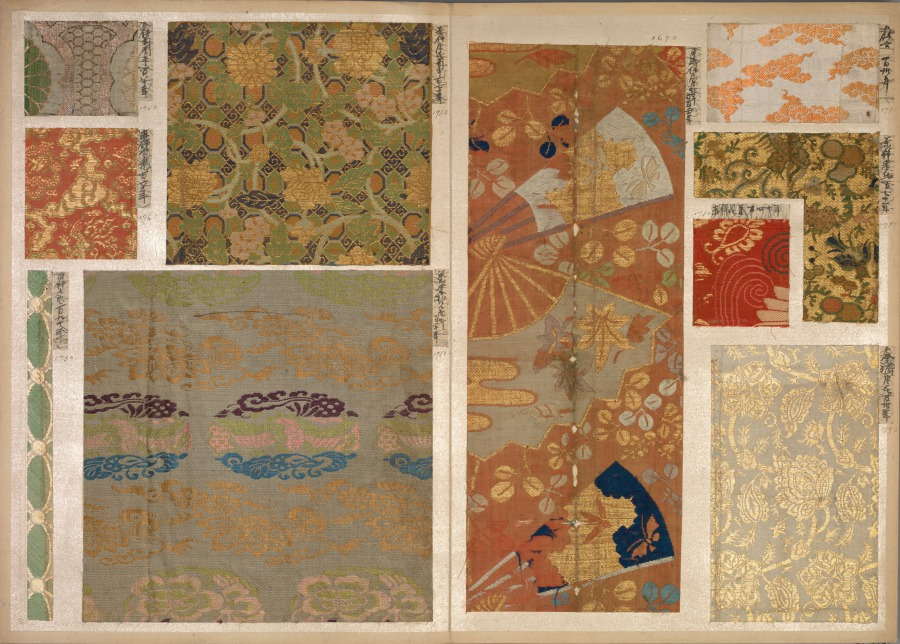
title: Album of Textile Samples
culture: Japan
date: 1790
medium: silk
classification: Textile